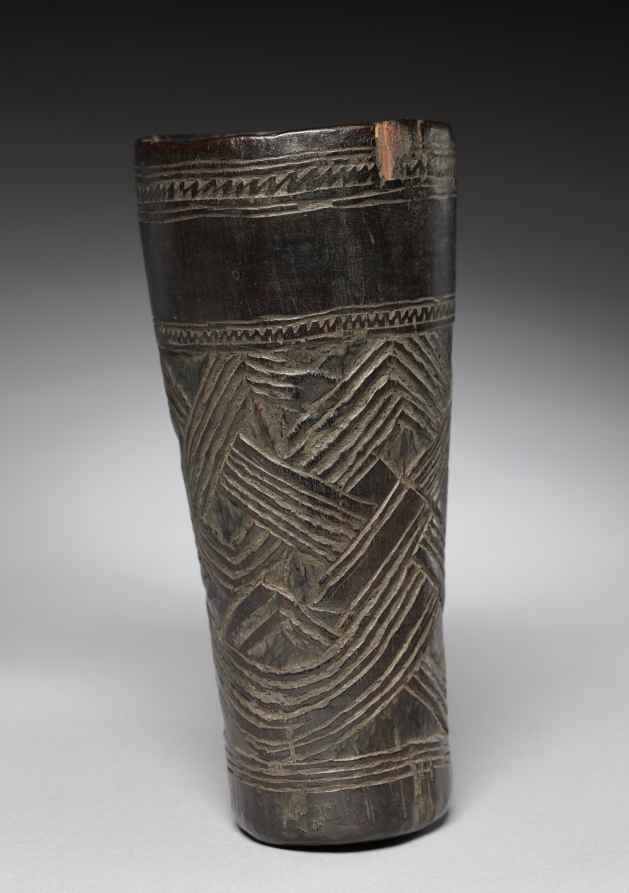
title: Cup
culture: Central Africa, Democratic Republic of the Congo, Bushoongo, 20th century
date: 1900s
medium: Wood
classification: Vessels